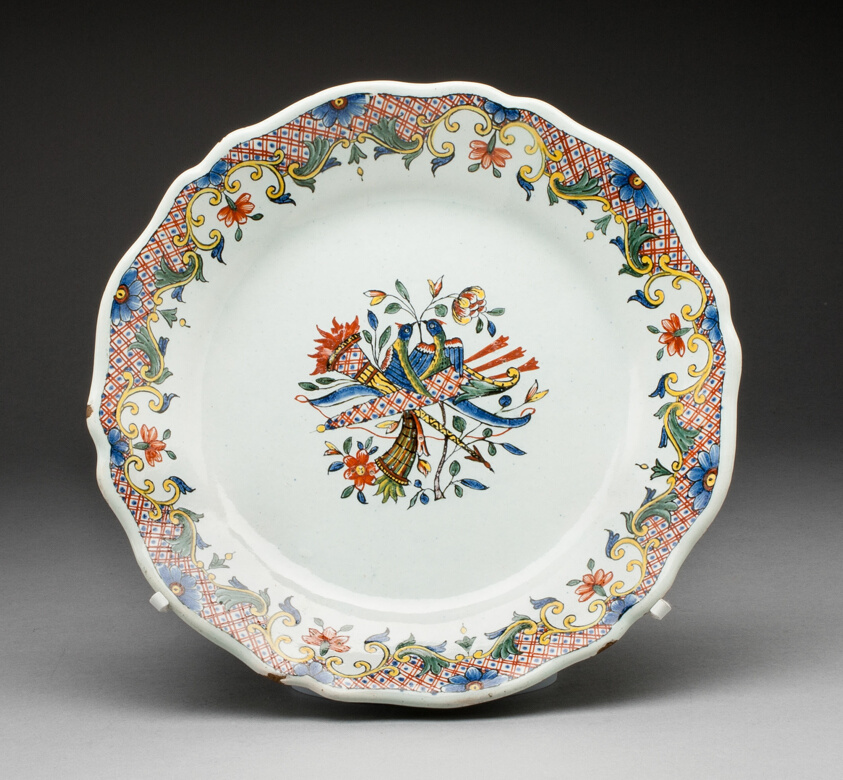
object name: Ceramics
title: Plate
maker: France, Rouen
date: c. 1760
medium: Tin-glazed earthenware (faience)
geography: Rouen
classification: plate (general, dish); dish (vessel); tin-glazed ware; earthenware; european decorative arts; ceramics